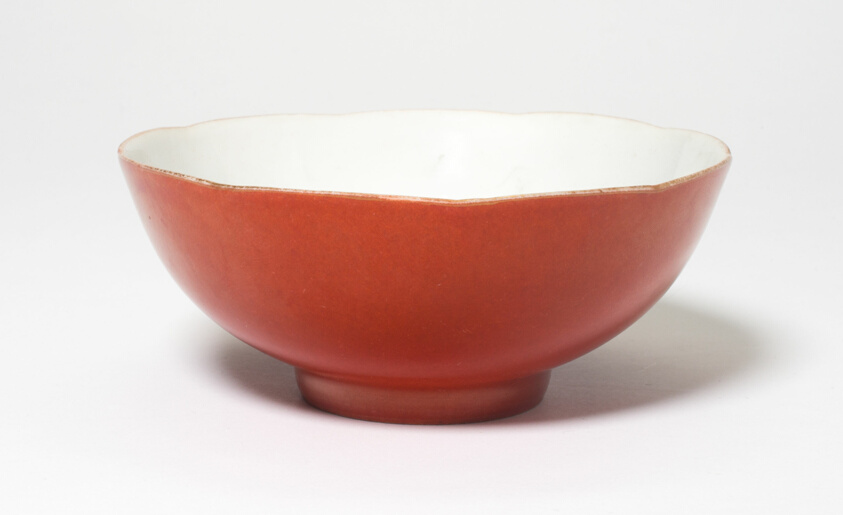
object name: Vessel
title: Coral-Glazed Bowl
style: Chinese (culture or style)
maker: China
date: Qing dynasty (1644–1911)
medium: Porcelain with red glaze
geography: China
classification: bowl; porcelain; dish (vessel); asian art; ceramics; vessel